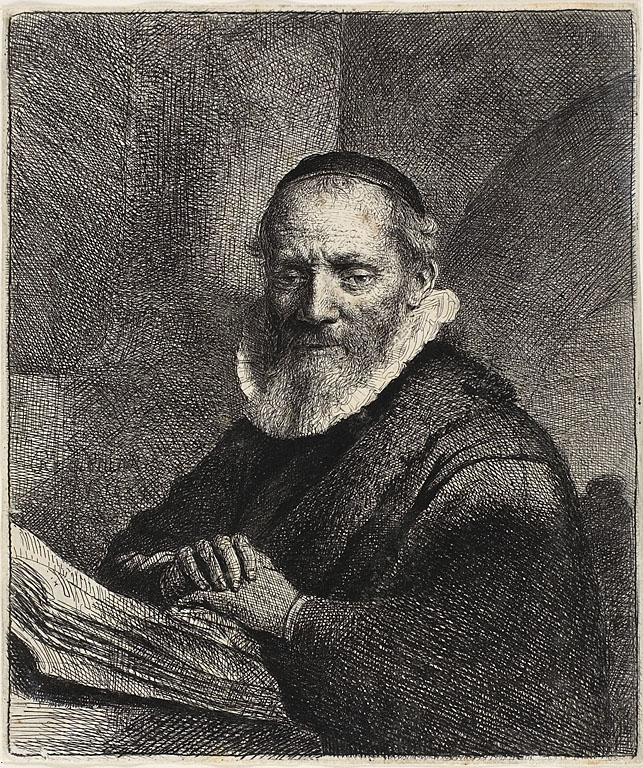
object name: Print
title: Jan Cornelius Sylvius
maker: Rembrandt van Rijn (Dutch, 1606-1669)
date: 1633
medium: Etching on ivory laid paper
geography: Holland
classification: etching; print; prints and drawing; paper